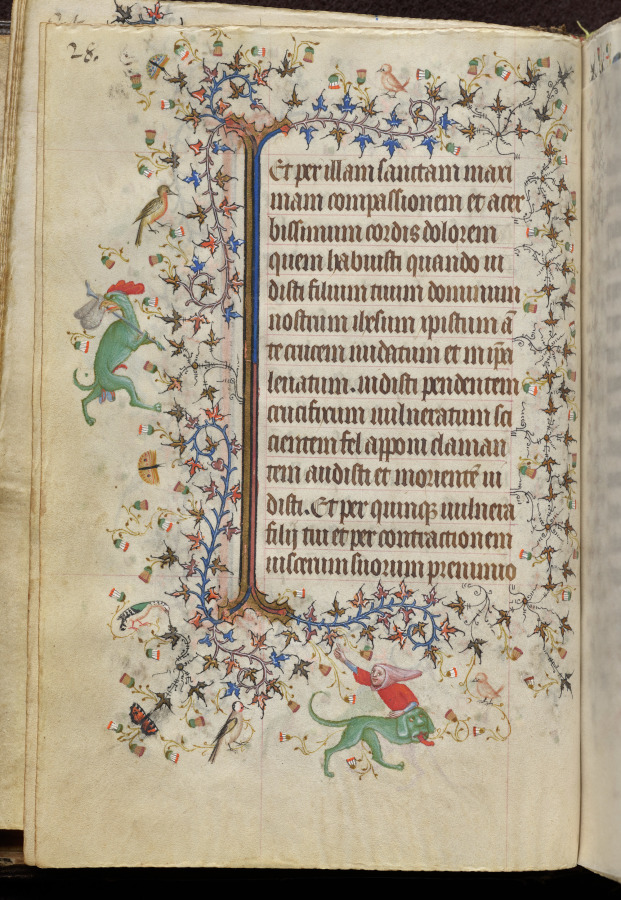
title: Hours of Charles the Noble, King of Navarre (1361-1425): fol. 14v, Text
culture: France, Paris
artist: Master of the Brussels Initials and Associates (French)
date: c. 1405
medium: ink, tempera, and gold on vellum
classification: Bound Volume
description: This precious book was highly prized by its owner, Charles III, King of Navarre, a French-born prince whose coat of arms is painted on 20 folios. Charles visited Paris on numerous occasions and likely acquired this volume there in 1404. Paris was the center of the European book trade at the time and attracted illuminators from many parts of Europe. This manuscript represents one of the most remarkable fusions of French and Italian taste in book illumination. Though conforming to Parisian standards, most of the book’s major miniatures are the work of the Brussels Initials Master, an Italian illuminator who previously worked in Bologna and Padua.